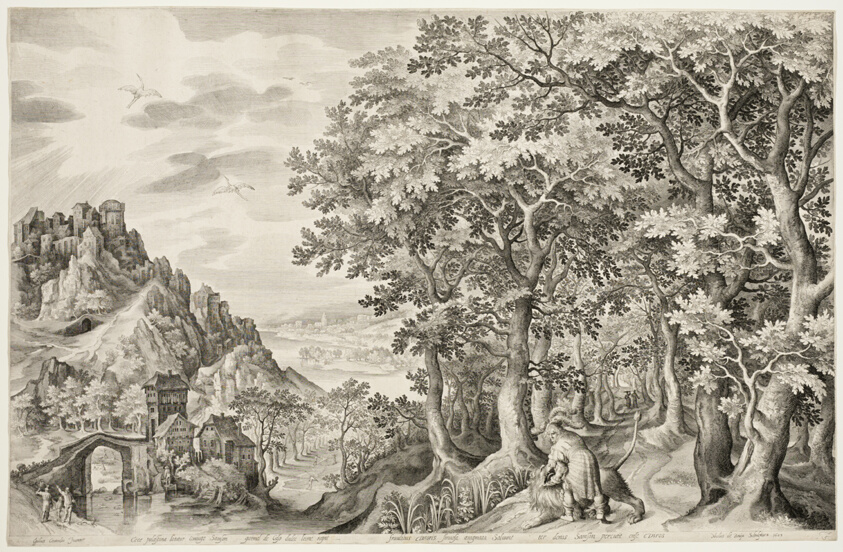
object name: Print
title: Samson Killing the Lion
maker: Nicolaes de Bruyn (Flemish, 1571-1656); after Gillis van Coninxloo (Netherlandish, c. 1544-1607)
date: 1603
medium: Engraving in black on ivory laid paper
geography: Flanders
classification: engraving; print; prints and drawing